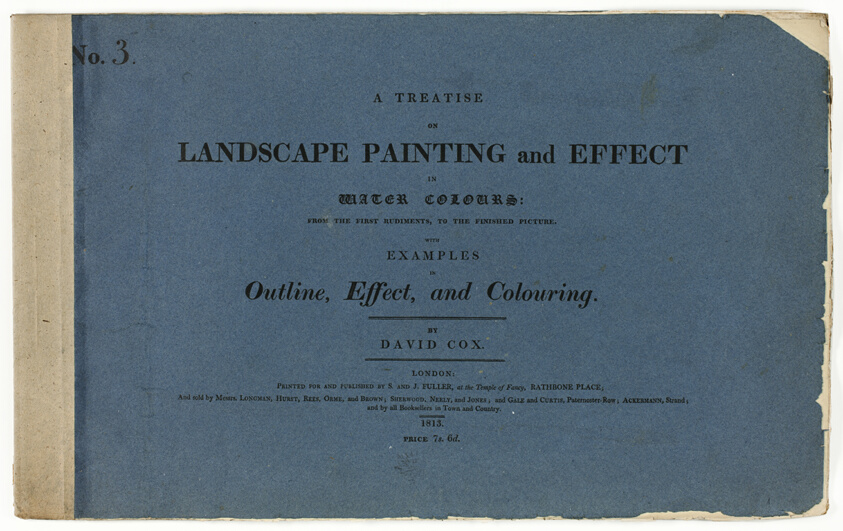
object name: Book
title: A Treatise on Landscape Painting and Effect in Water Colours: From the First Rudiments, to the Finished Picture No. 3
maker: David Cox, the elder (English, 1783-1859); published by S. and J. Fuller (English, 19th century)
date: 1813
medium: Book with six etchings and letterpress in black on cream wove paper, in box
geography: England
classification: book; paper; prints and drawing